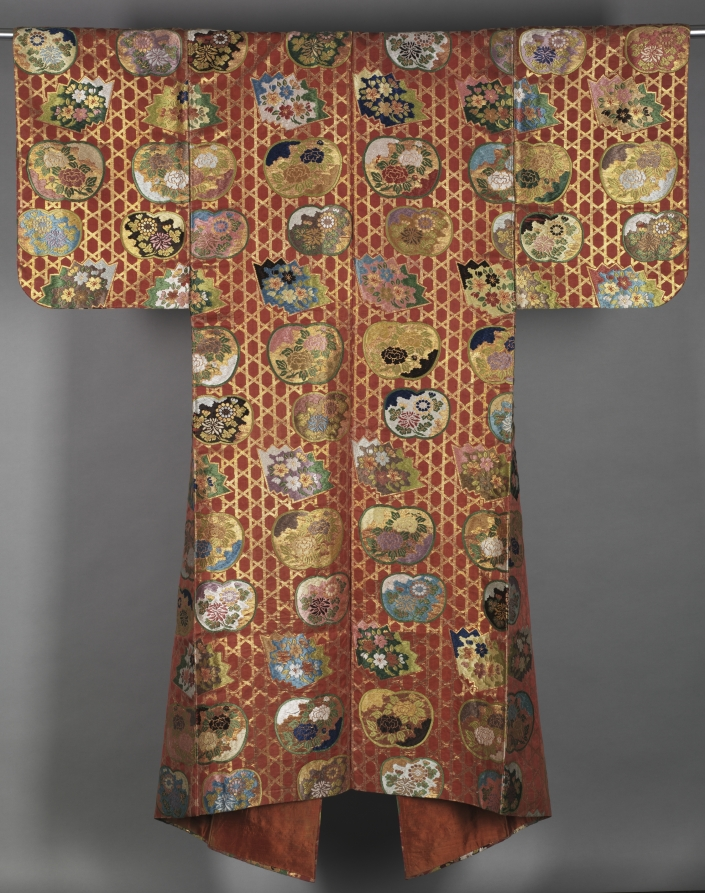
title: Noh Robe (Karaori)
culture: Japan, Edo period (1615–1868)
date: 1800–1850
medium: twill weave with supplementary weft, brocaded; silk and gold thread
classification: Garment